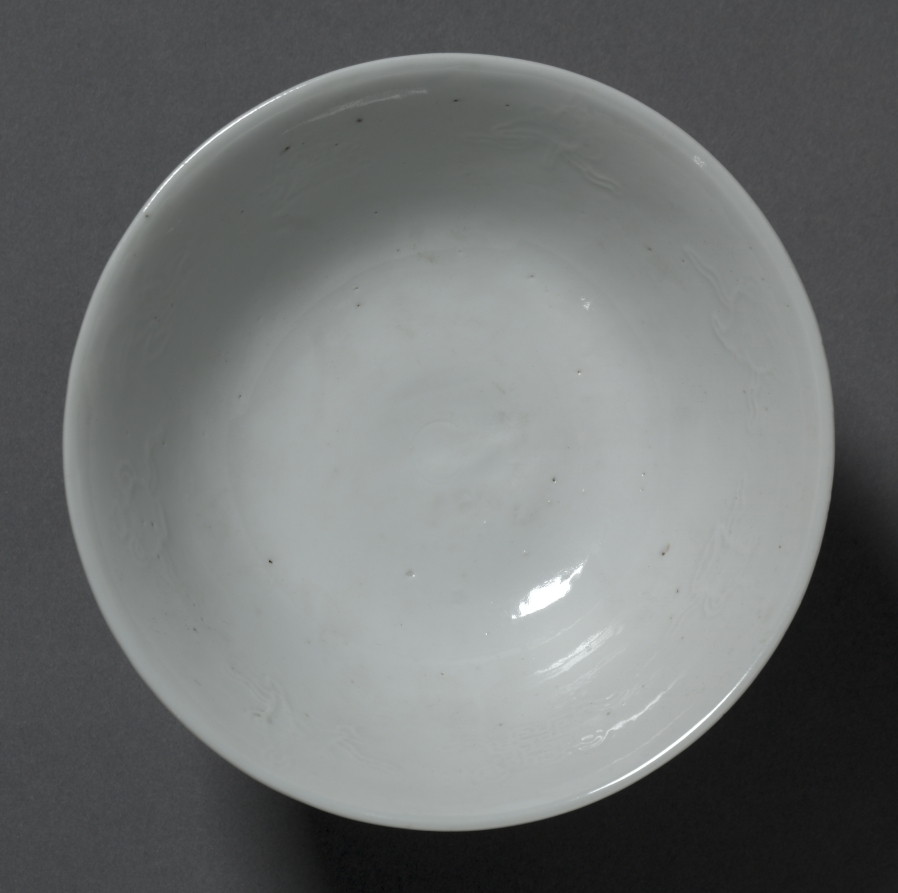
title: Stem Cup with Buddhist Emblems: Shufu Ware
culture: China, Jiangxi province, Yuan dynasty (1271-1368)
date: 1300s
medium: porcelain with molded decoration and white glaze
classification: Ceramic